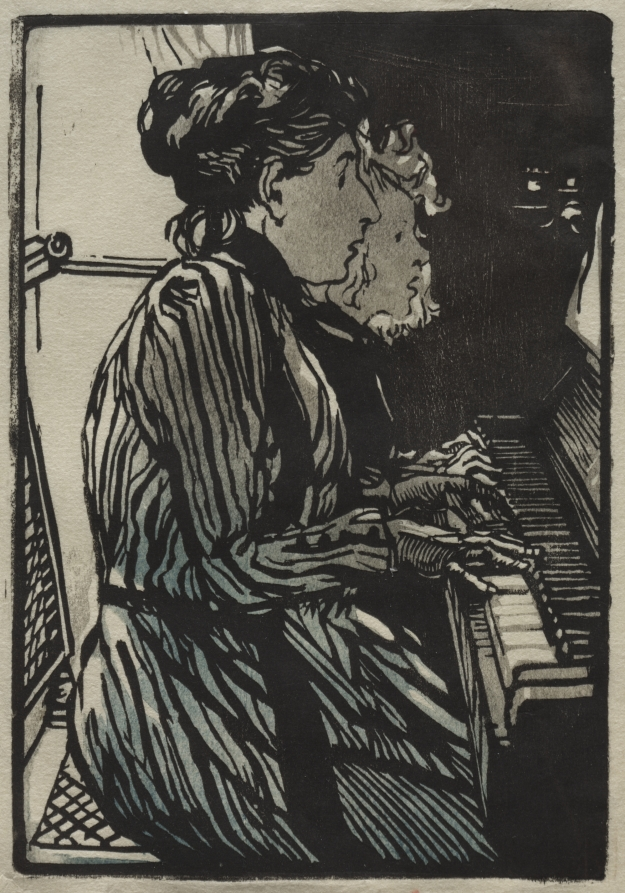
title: Etude a Quatre Mains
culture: France, 19th century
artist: Auguste Louis Lepère (French, 1849–1918)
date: 1890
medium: color woodcut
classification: Print